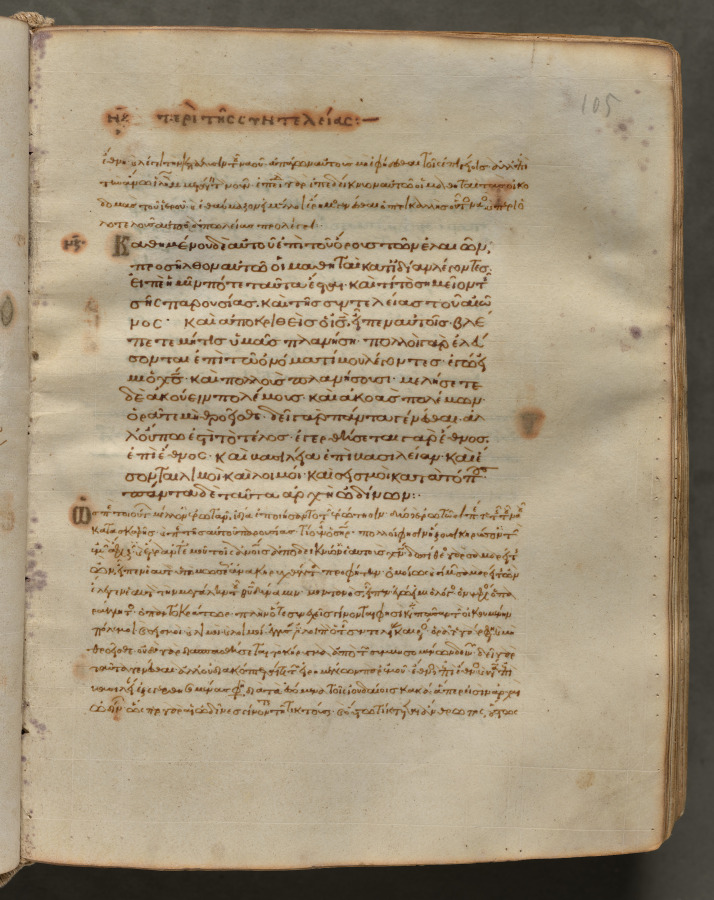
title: Text, folio 105 (recto), from a Gospel Book with Commentaries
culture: Byzantium, Constantinople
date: c. 1000–1100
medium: ink, tempera, and gold on vellum; leather binding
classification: Bound Volume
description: Each of the four gospels in this book opens on a page with brilliantly illuminated borders depicting the author of the text as well as birds-principally peacocks, symbols of the immortality of the soul-and fountains, representing the fountain of life and the salvation of the soul. This volume consists of 428 leaves with texts in Greek. Its level of sophistication suggests that it was probably written and decorated in a monastery in Constantinople.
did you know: Gospel Books were carried in procession through Byzantine churches.